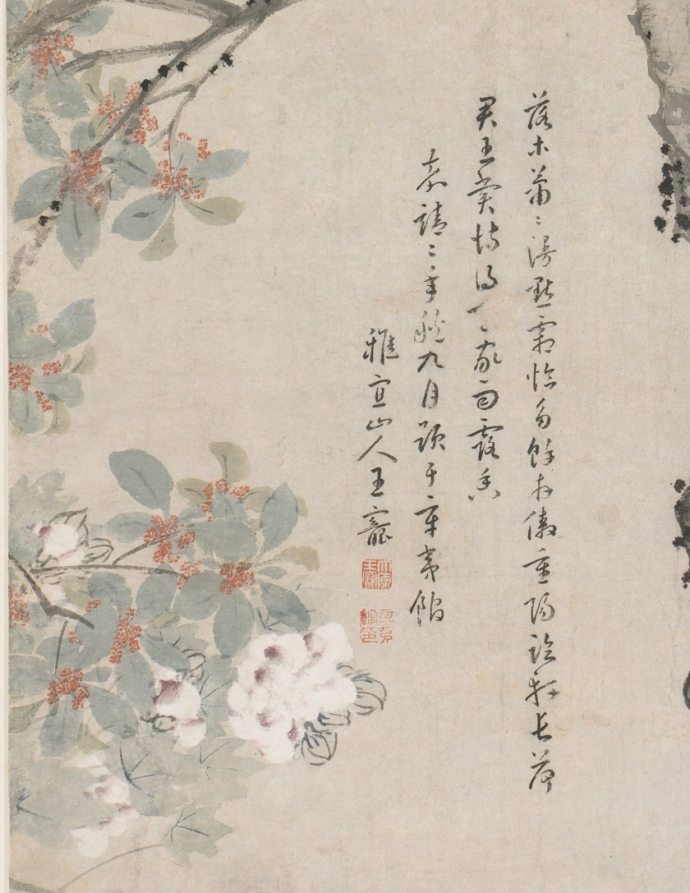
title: Yellow Chrysanthemums and Red Osmanthus in the Style of Wang Yuan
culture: China, Ming dynasty (1368–1644)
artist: Shen Zhou (Chinese, 1427–1509)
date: 1468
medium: hanging scroll, ink on paper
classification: Painting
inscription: Artist's inscription, signature, and 2 seals at upper right: Beneath the fence yellow [chrysanthemum] flowers brave the rain to blossom;/ Still others lean on the red osmanthus tree and dazzle the deep green moss./ With a goblet [of wine] I face them, entirely without concern;/ Who will answer the knocking at the gate where a guest has arrived? In the ninth month of the fourth year of the Chenghua era [1468], I followed the brush-conception of Wang Danxuan 王澹軒 [Wang Yuan 王淵] at the Youzhuzhuang 有竹庄 [House with Bamboo]. Inscribed and [painted] by Shen Zhou 沈周 of Changzhou 長洲. [seals] Shitian 石田; Shen shi Qinan 沈氏启南. trans. HR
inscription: 1 additional inscription, dated 1523, and 2 seals of Wang Chong 王寵 (1494-1533).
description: Shen Zhou, a native from Suzhou, was descended from a prominent land-owning family with strong ties to literati culture. Because Shen Zhou never entered government service, he had ample opportunity to cultivate the arts of painting, poetry, and calligraphy. Chrysanthemums and red osmanthus both bloom in autumn. The deep orange osmanthus flowers emanate a characteristically sweet fragrance. According to his inscription on the painting, Shen Zhou sought to imitate the style of the Yuan dynasty (1271–1368) painter Wang Yuan. His color-filled brushstrokes and washes, however, anticipate the flower painting style of Yun Shouping, whose Peonies are also in the Cleveland Museum of Art collection, https://www.clevelandart.org/art/1967.192. The sheer size and complex composition of this scroll are impressive.